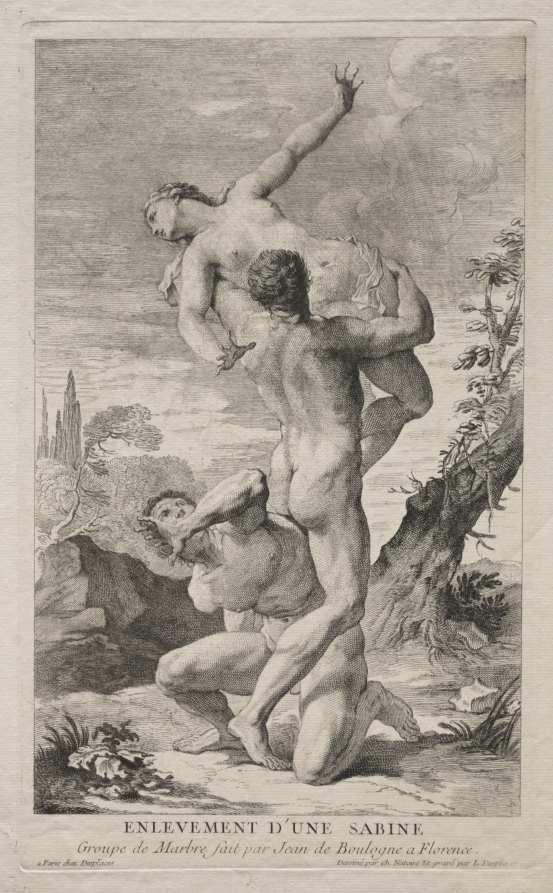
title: Rape of the Sabines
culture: France, 18th century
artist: Louis Desplaces (French, 1682–1739)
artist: after Charles Joseph Natoire (French, 1700–1777)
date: 1700s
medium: engraving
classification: Print